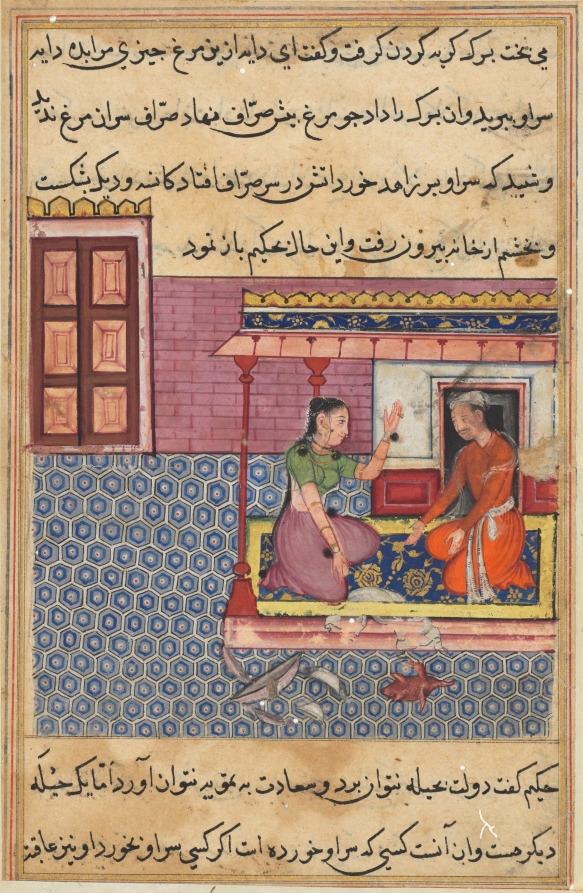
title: The pious man’s wife offers the seven-colored bird as food to her lover, but not finding its head, he breaks the pot and bowl in anger, from a Tuti-nama (Tales of a Parrot): Fifty-second Night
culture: Mughal India, court of Akbar (reigned 1556–1605)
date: c. 1560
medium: gum tempera, ink, and gold on paper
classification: Painting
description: The treacherous man knows that whoever eats the bird’s head will become a king; however, the woman’s son has already eaten it. Enraged, he demands that she cut off her son’s head and cook it for him. Maddened by love, the woman agrees. The son’s nurse learns of the woman’s terrible plan and flees with him to safety.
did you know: The cooked body of the seven-colored bird lies thrown on the tiled floor.